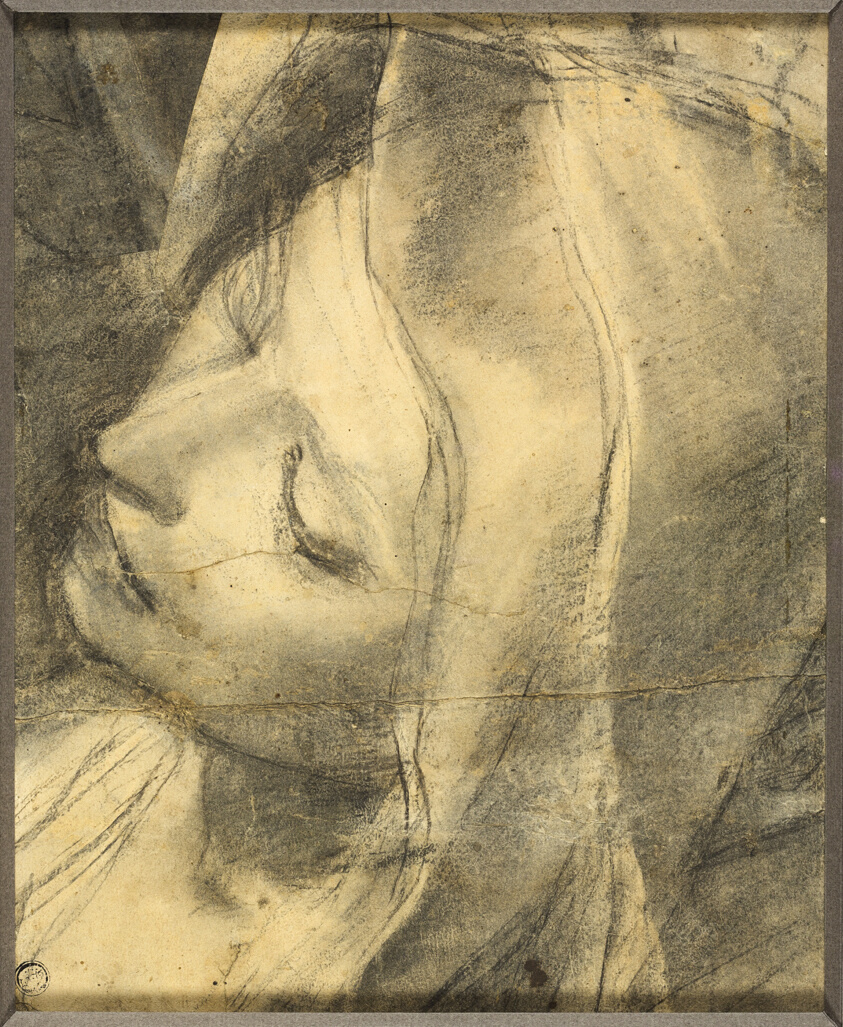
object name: Drawing and Watercolor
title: Head of the Swooning Virgin: Study for the Deposition (recot) Base of Column (verso)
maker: Federico Barocci (Italian, c. 1535-1612)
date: 1568/69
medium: Black chalk and charcoal, with stumping and traces of white chalk, on tan laid paper, pieced and incised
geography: Italy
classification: chalk; drawings (visual works); prints and drawing